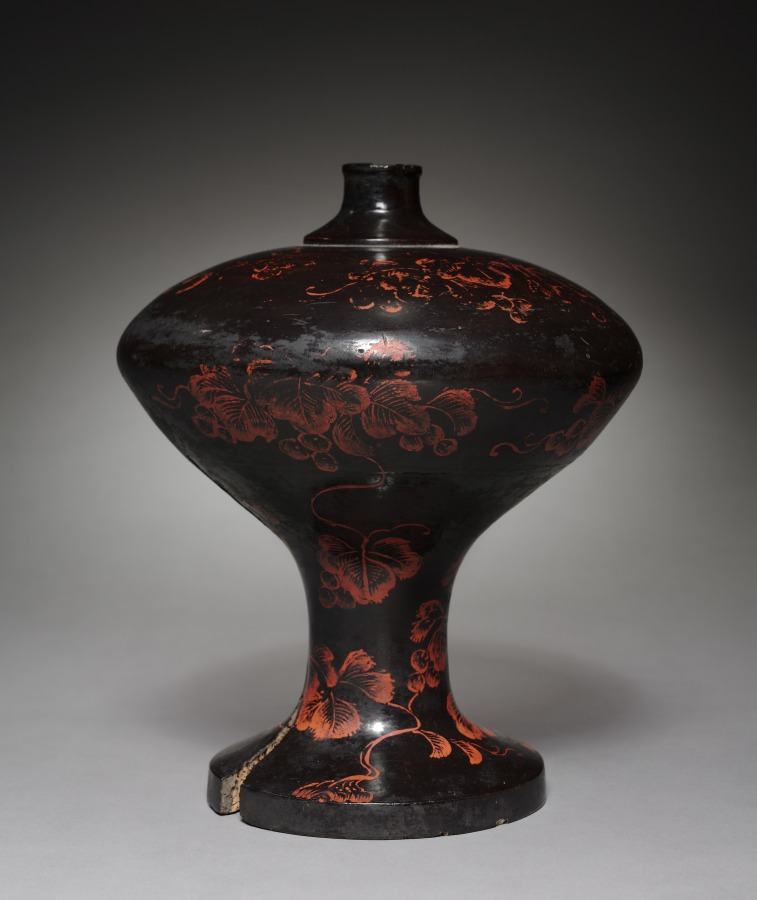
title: Sake Flask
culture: Japan, Muromachi period (1392–1573)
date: 1500s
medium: Black laquered wood with red lacquer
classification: Lacquer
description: This flask contained rice wine, or sake. Its wood body was shaped by a lathe before black lacquer was applied to the surface. A red lacquer design of grapevines, an auspicious motif, covers the surface. With their numerous, long-lasting fruits, grapevines traditionally symbolized fertility and longevity in East Asia.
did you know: The evocative imagery of brushed leaves and bunches of grapes suggest that the artist referred to a particular painting when decorating this vase.